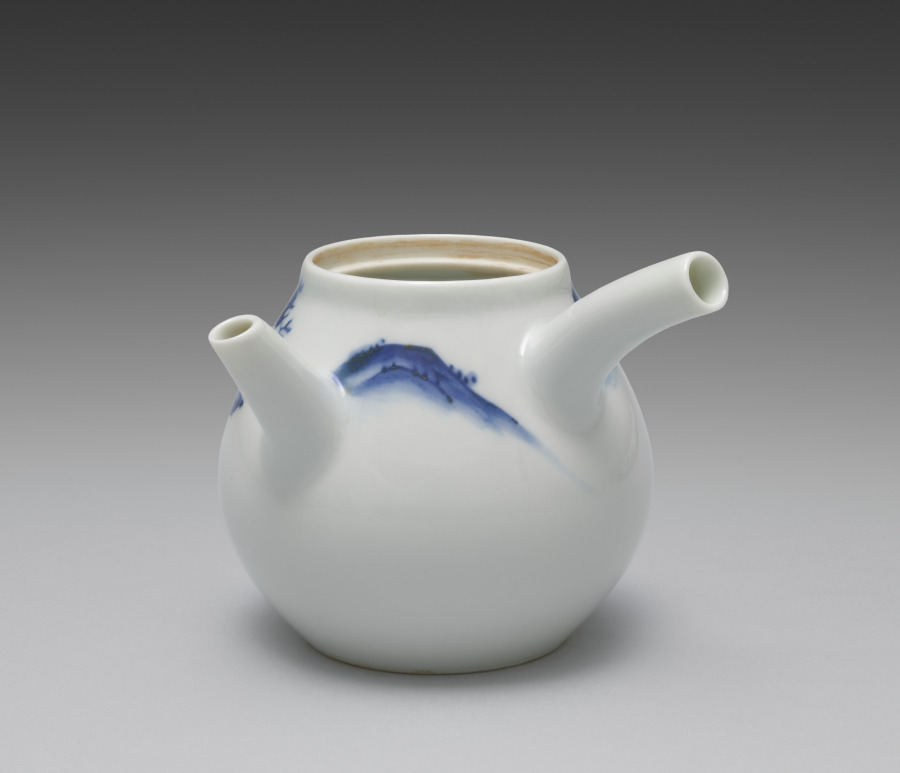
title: Teapot from Tea Set with Chinese Landscape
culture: Japan, Meiji period (1868–1912)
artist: Seifū Yohei III (Japanese, 1851–1914)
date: 1893–1914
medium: Porcelain with underglaze blue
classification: Ceramic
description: This tea set with idyllic lakeside Chinese landscapes has a side-handled pot called a kyūsu, used for steeping, straining, and serving tea. Unlike some others, this set also has a yuzamashi, a container used to cool boiled water to just the right temperature for the best flavor when steeping. Seifū Yohei III’s painting teacher, Tanomura Chokunyū (1814–1907), made a visual record of famous sencha events that shows how these kinds of porcelains fit with objects such as a stove and kettle to form a complete set of utensils for tea preparation, and with ensembles of decorative objects meant to inspire creativity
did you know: The side-handled pot is called a kyūsu, used for steeping, straining, and serving tea.